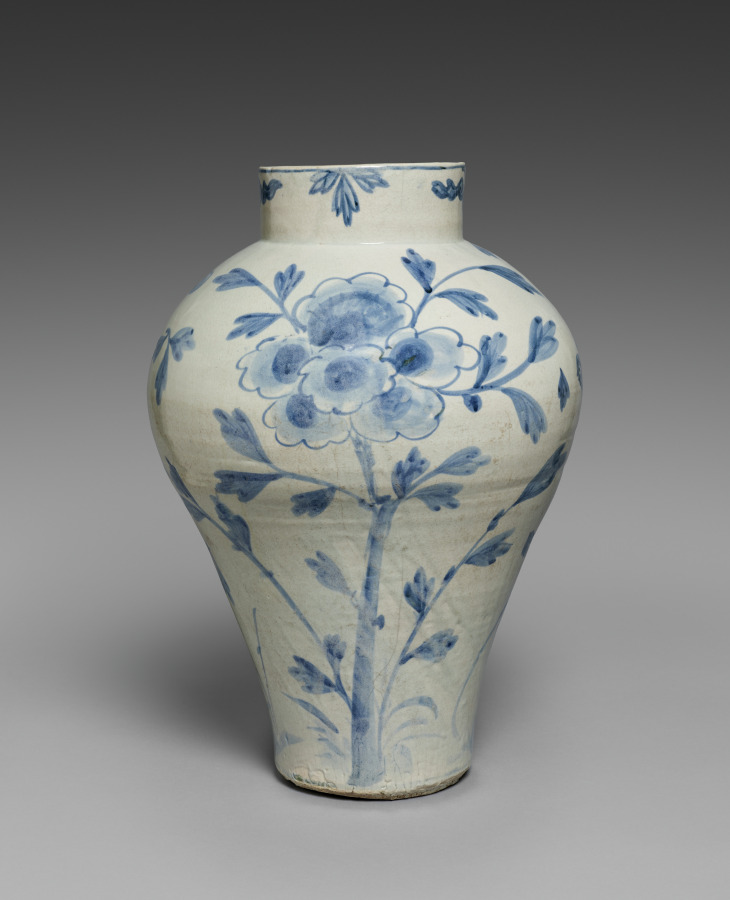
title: Vase with Bird and Flower Design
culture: Korea, Joseon dynasty (1392–1910)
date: late 1800s–early 1900s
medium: porcelain with underglaze blue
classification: Ceramic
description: This vase with broad shoulders and a tall neck represents a typical style of 19th-century blue-and-white porcelain. Unlike earlier examples decorated mainly with literati themes that evoke neo-Confucian moral values—plum blossoms (purity), orchids (grace), bamboo (integrity), and chrysanthemums (loftiness)—porcelain works of the 1800s feature fully bloomed peonies and a pair of playful birds, symbols of wealth and familial harmony.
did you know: Nineteenth-century Korean blue-and-white porcelains tend to feature broad shoulders and a tall neck.